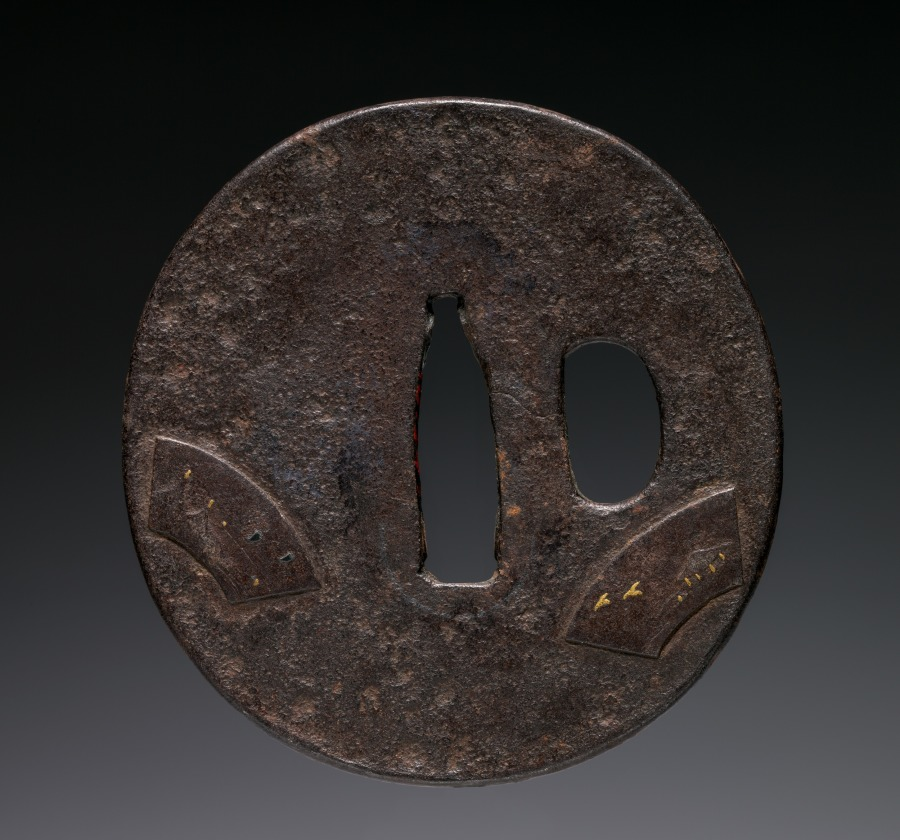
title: Sword Guard (Tsuba) with Scattered Fans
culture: Japan, possibly Edo period (1615-1868)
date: c. 1615–1868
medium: iron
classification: Arms and Armor